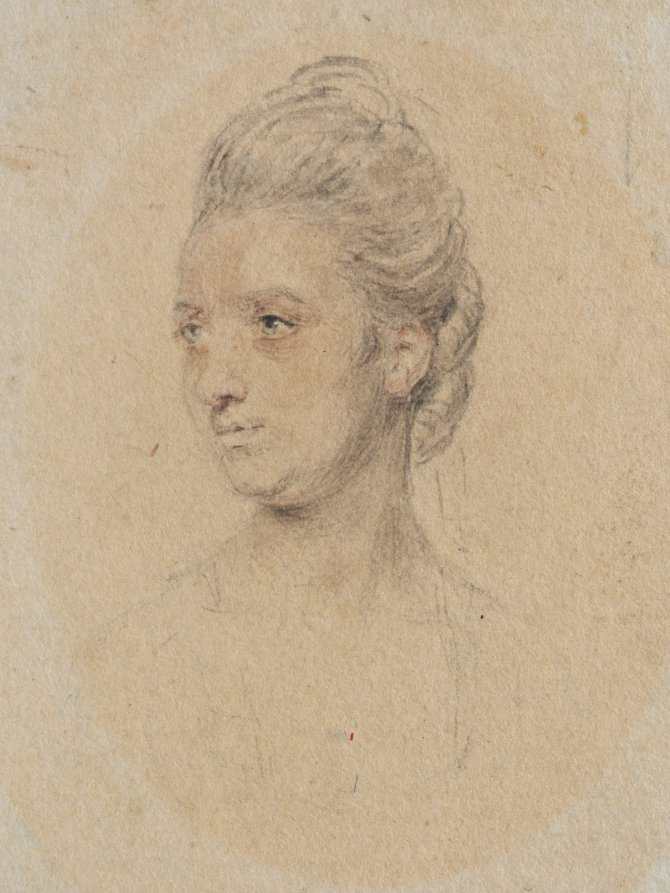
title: Portrait of a Woman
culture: England, 18th century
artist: John I Smart (British, 1741–1811)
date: c. 1772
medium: graphite and wash on laid paper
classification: Portrait Miniature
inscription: inscribed on paper backing: in graphite, upside down at top: 134; in graphite on slant below center: Eleanor of / Spain; on the inside of the outside backing, in center in graphite: M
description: Although it is impossible to say if it was always part of the artist’s process to execute a preparatory sketch prior to painting each miniature, we do know that John Smart retained many hundreds of these sketches. A group of preparatory sketches—of which this portrait is one—descended through the Smirke family after Smart’s daughter Sarah gave a sketchbook containing preparatory portrait studies to her friend Mary Smirke, sister of the celebrated Victorian architect Sydney Smirke. This book was probably broken up around 1877 when it was divided between Sydney’s daughters Mary Jemmett and Mrs. Lange, whose portions were both sold at auction in 1928. This portrait was assigned the historically colorful but fictitious title of “Eleanor of Spain” at some point after memory of its true identity had been lost. Giving illustrious titles to portraits of unknown sitters was a popular strategy adopted by dealers during the nineteenth and twentieth centuries, often applied to miniature portraits and, in particular, to Smart’s sketches of women. The inscription on the paper backing is not in Smart’s hand, and when the paper backing was removed in 1993, no inscriptions were discovered on the back of the drawing itself. Only the sitter’s head and neck are drawn, and a low-necked dress is faintly suggested. Her head is turned to the right, and her light-colored hair is dressed high, with flat curls against the back of her head. She has blue eyes, and the color of her lips is extremely faded, as is the miniature overall. The sitter’s sagging jaw line and the lines beneath her eyes suggest that she was painted as a mature woman. The background is unpainted. A photograph of this sketch in Edward Greene’s notebook indicates that at one time “134” was inscribed on the front in the upper right corner. To this date, the finished ivory for which this preparatory sketch was presumably undertaken has not been discovered. A miniature from the Nelson-Atkins Museum of Art’s Starr collection, while probably not this sketch’s finished ivory counterpart, is closely related in style and date. The Nelson-Atkins unidentified sitter’s veiled hairstyle, position of the head in relation to her squared shoulder, and plump jaw line are identical to the Cleveland sketch. During this stage of Smart’s career, the sitters’ heads were often rather large in relation to their bodies.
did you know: Sketches helped John Smart work out the particulars of a portrait before commencing the miniature on ivory; they were useful in the event that a duplicate might later be required.